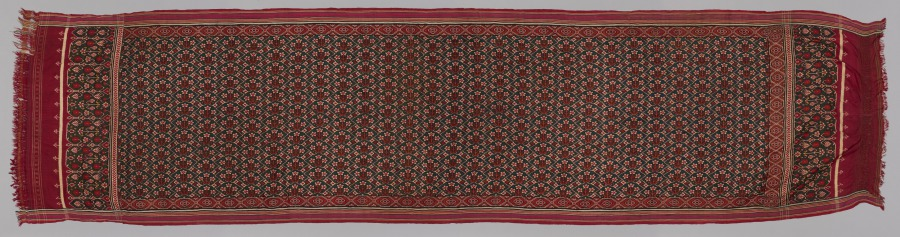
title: Silk Patolu Sari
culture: India, Gujarat, 19th century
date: 1800s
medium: tabby weave, double ikat; silk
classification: Textile